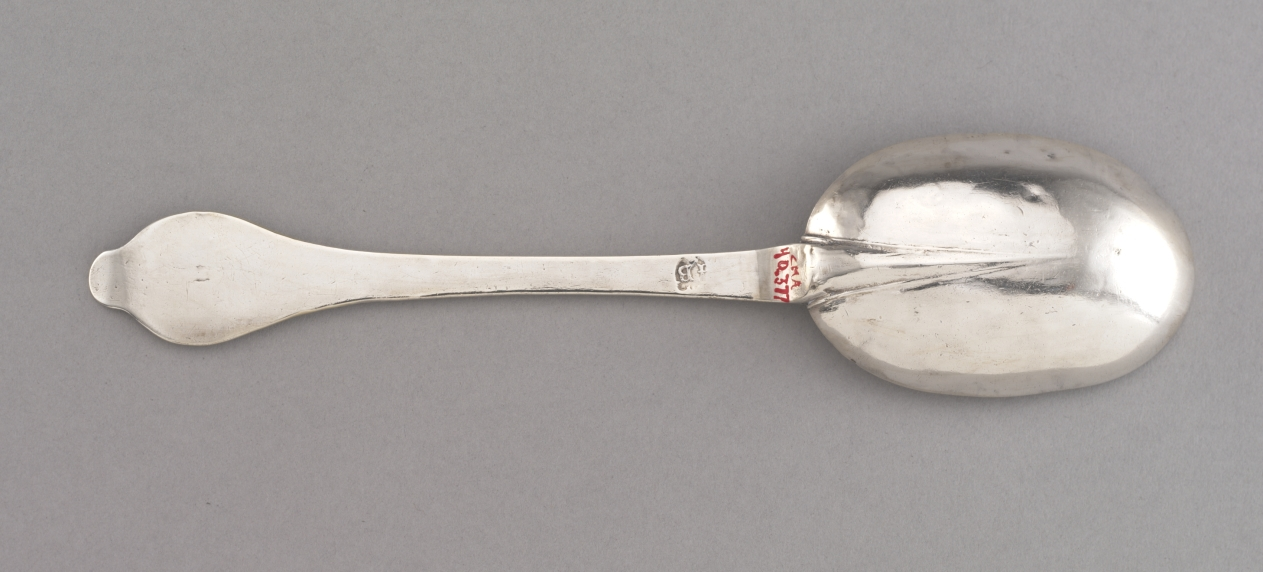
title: Tablespoon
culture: America, New York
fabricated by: Jacob Boelen I (American, 1654–1729)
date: 1700–1720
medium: silver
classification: Silver